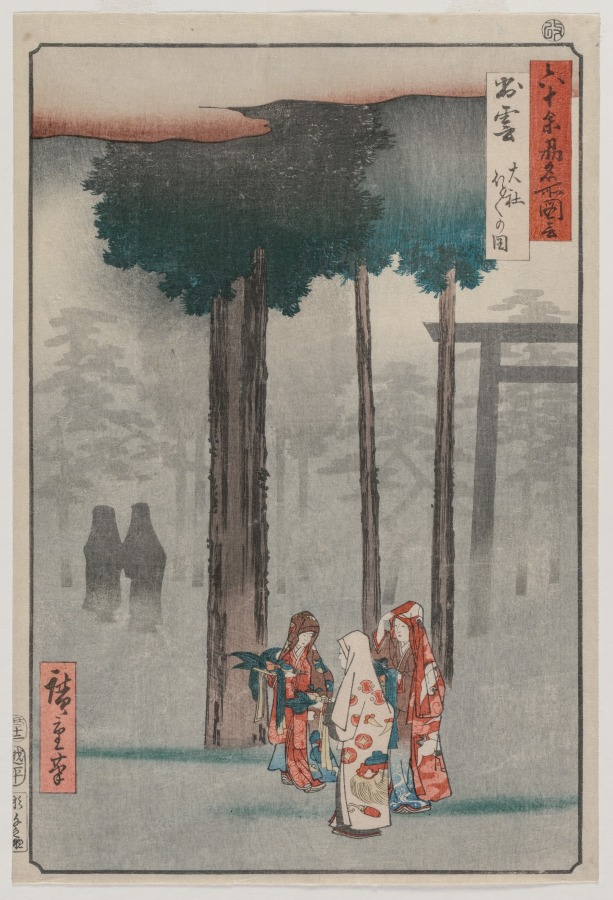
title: Hotohoto Festival at Izumo Grand Shrine, from the series Views of Famous Places in the Sixty-odd Provinces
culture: Japan, Edo period (1615–1868)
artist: Utagawa Hiroshige (Japanese, 1797–1858)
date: 1853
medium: Color woodblock print, ink and color on paper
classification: Print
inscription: Signature: Hiroshige hitsu. Publisher: Echimuraya Heisuke (Echihei). Engraver: Hori Sennosuke. Censorship Seal: aratame.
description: Izumo Shrine is a Shinto shrine on Honshu Island. The Japanese believe that Shinto kami (divine spirits) leave their own shrines for a month in October or November—depending on the lunar calendar—and travel to Izumo Shrine. During this time, a festival is held in which celebrants carrying lighted torches lead the kami to the shrine.